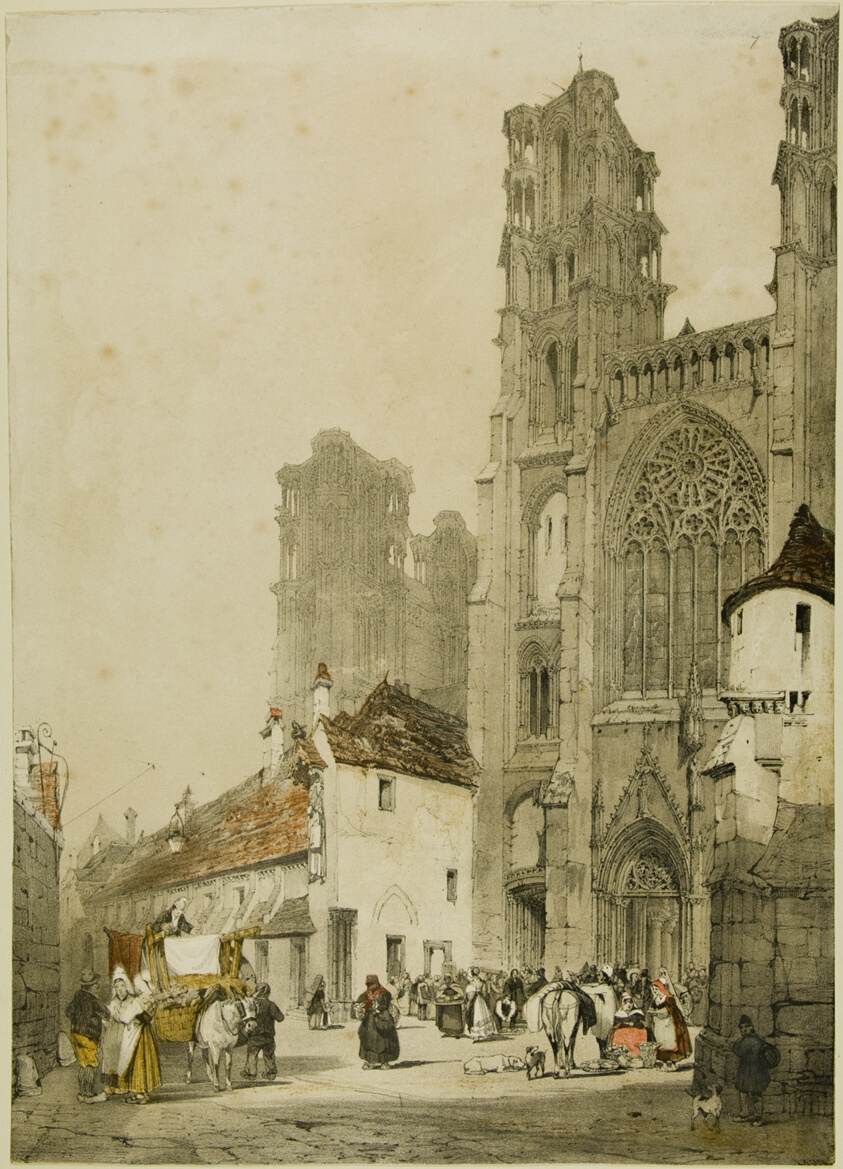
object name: Print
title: Picturesque Architecture in Paris, Ghent, Antwerp, Touen, etc.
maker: Thomas Shotter Boys (English, 1803-1874); published by Charles Joseph Hullmandel (English, 1789-1850)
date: 1839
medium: Color lithograph on paper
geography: England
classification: lithograph; print; prints and drawing